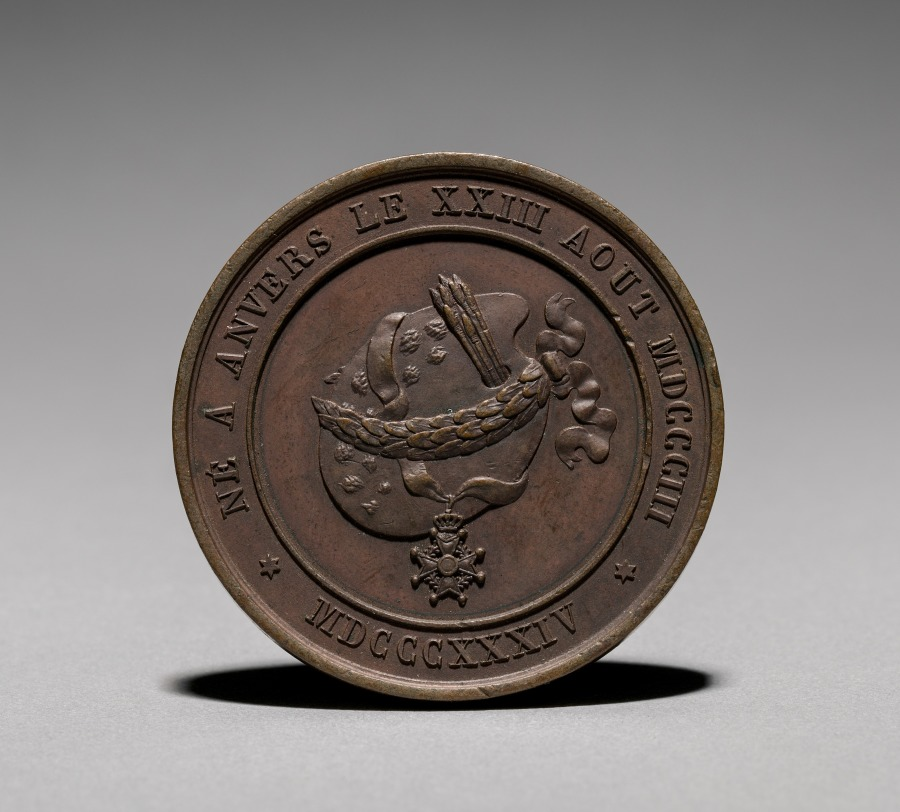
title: Medal: Gustaf Wappers (reverse)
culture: 19th century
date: 1800s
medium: bronze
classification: Metalwork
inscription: "NE A ANVERS LE XXIII AOUT. MDCCCIII. MDCCCXXXIV."